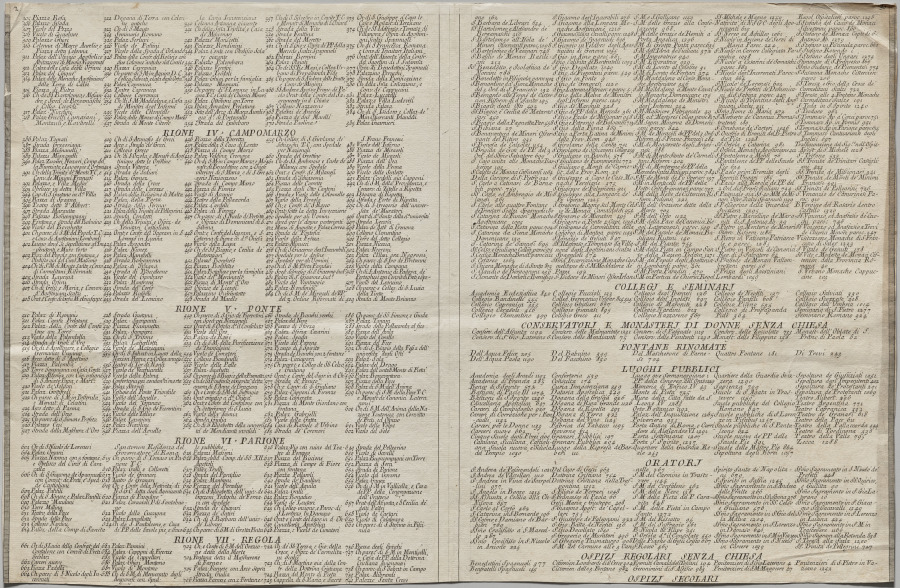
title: Nuova pianta di Roma data in luce da Giambattista Nolli l’anno MDCCXLVII, known as La Pianta Grande di Roma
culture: Italy, 18th century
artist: Giovanni Battista Nolli (Italian, 1701–1756)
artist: Carlo Nolli (Italian, 1690–1790)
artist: Rocco Pozzi (Italian, 1701–1774)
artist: Pietro Campana de Soriano (Italian, 1725–c. 1779)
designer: Stefano Pozzi (Italian, 1699–1768)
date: 1748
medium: etching and engraving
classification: Print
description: The monumental Pianta Grande di Roma, or Large Plan of Rome, which measures about 5 x 7 feet when its twelve plates are assembled, is a landmark in both cartography and printmaking. The map is considered the first scientific rendering of Rome, establishing new standards of accuracy and thoroughness when it was published in 1748. Devised by the Lombard architect and surveyor Giovanni Battista Nolli (Italian, 1701-56), the creation of the map required over ten years of surveying the city carried out by Nolli and a team of assistants with the help of new measuring devices. In Nolli’s “ichnographic” (also called “ground”) plan, architectural features and the urban infrastructure are reduced to a single horizontal slice, a minutely detailed footprint that conveys dimensions, proportions, and orientations to scale with the utmost clarity.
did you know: To make this map, Pope Clement XII granted the mapmaker permission to measure courtyards and other interior, inaccessible spaces in monastic communities, even those in nuns’ convents, which was controversial at the time.